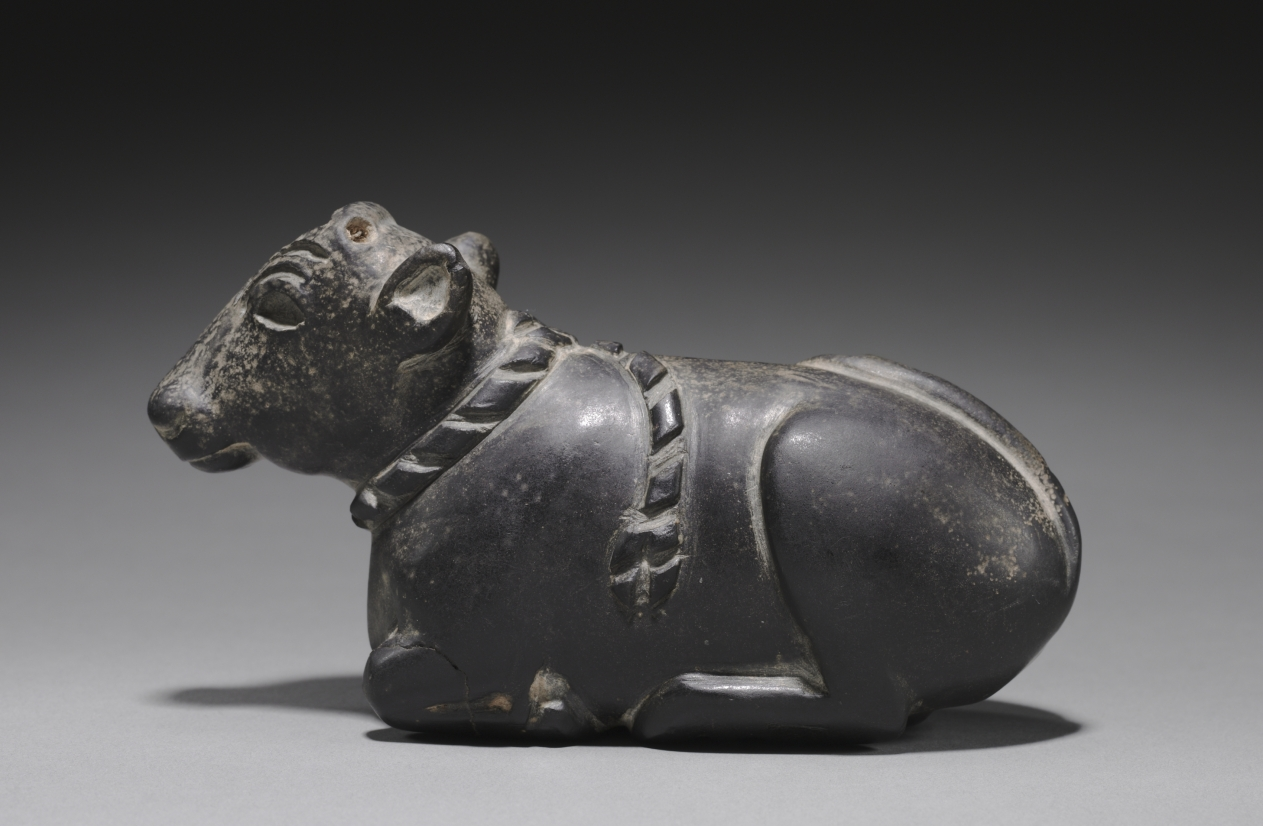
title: Bull Calf Polemount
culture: Sumerian, Iraq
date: c. 2700 BCE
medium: basalt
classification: Sculpture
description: Like most Mesopotamian sculptures in the round, this small bull was an object of worship in a temple. Its eyes, the triangle on the forehead, and the stripes in the rope were originally embellished with contrasting colored stones, or bone. The inlays are lost, but the sculpture itself is one of the very few original cult statues that have survived.